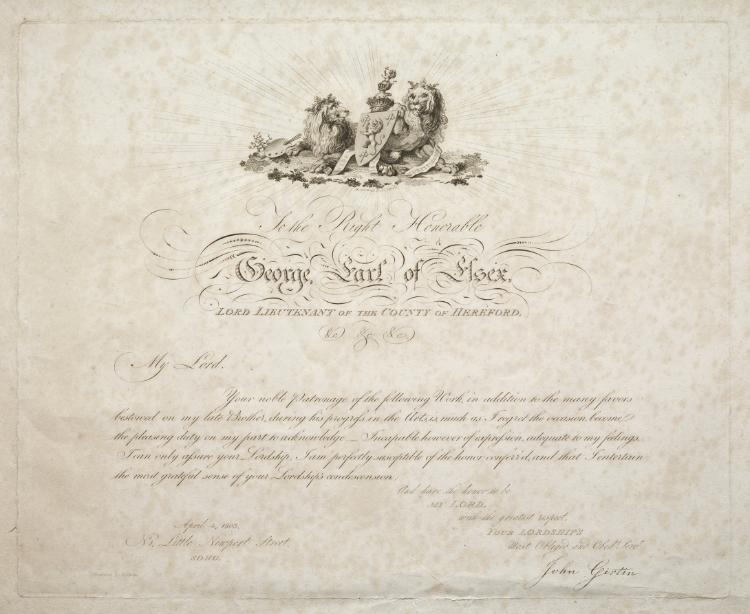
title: A Selection of Twenty of the Most Picturesque Views in Paris, and its Environs: Dedication Page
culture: England, 19th century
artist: John Girtin (British)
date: 1803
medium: engraving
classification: Print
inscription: Lower left: April 4, 1803 N. Little Newport Street / SOHO; lower right: And have the honor to be / my Lord, / with the greatest respect, YOUR LORDSHIP'S MOST OBLIGHTED and obedt. servt. John Girtin